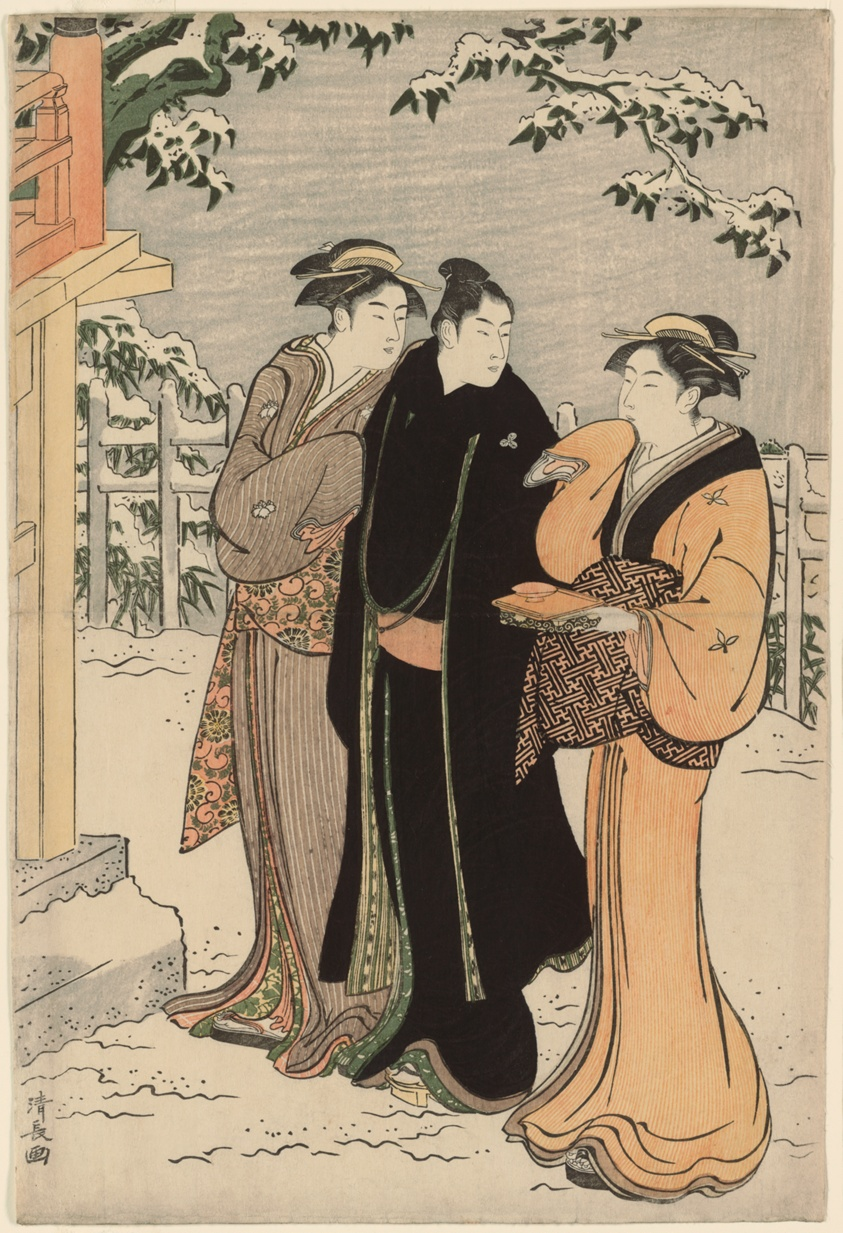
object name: Print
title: Matsuchi Hill after Snowfall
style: Japanese (culture or style)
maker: Torii Kiyonaga (Japanese, 1752-1815)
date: c. 1785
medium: Color woodblock print; left sheet of oban diptych (right sheet: 1925.2654)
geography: Japan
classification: woodblock print; print; asian art